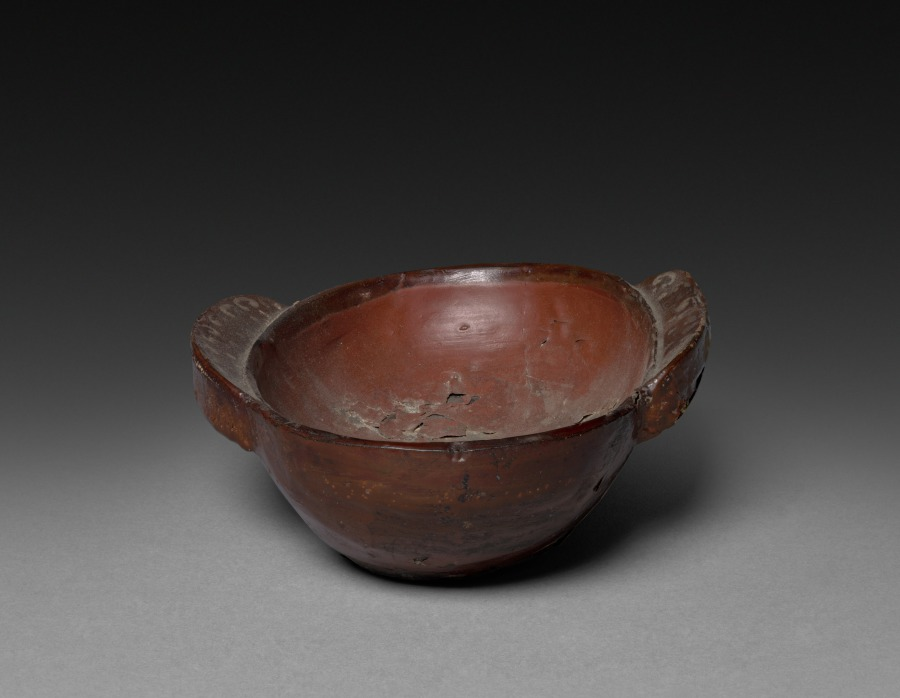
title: Cup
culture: China, Zhou dynasty (c. 1046–256 BCE)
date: c. 600–221 BCE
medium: lacquer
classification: Lacquer